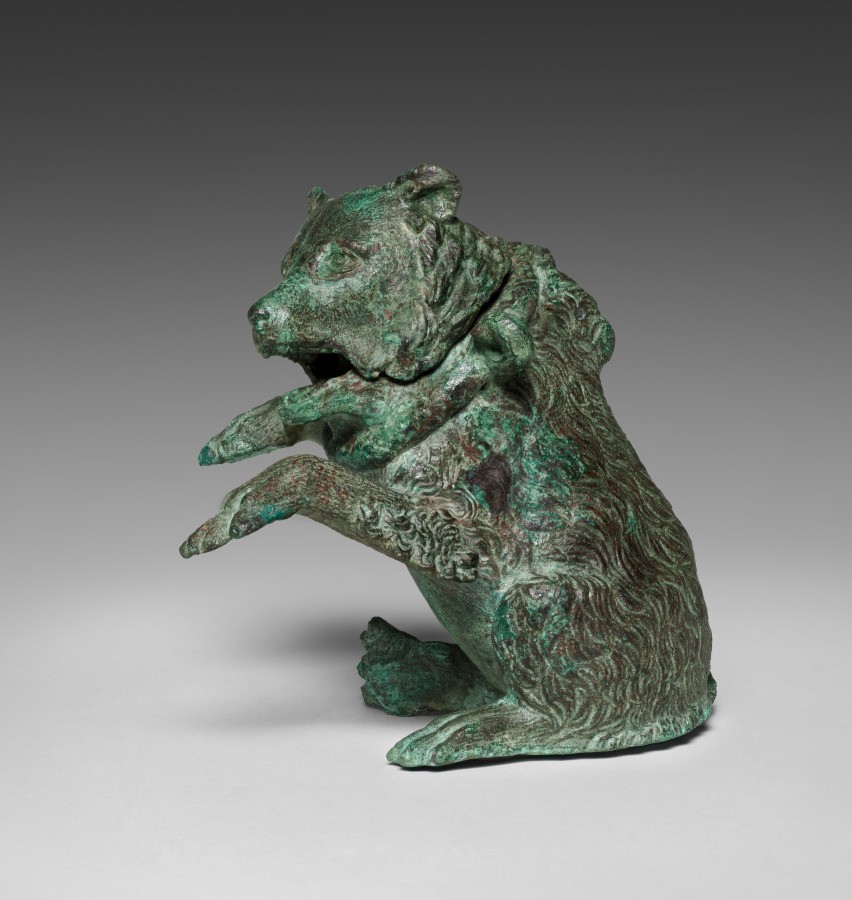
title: Oil Ampulla in the Form of a Dancing Bear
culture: Italy, Roman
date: 200s CE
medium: bronze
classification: Sculpture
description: This bronze bear sits on its hindquarters with its front paws raised, head slightly turned left, and mouth gaping open. It wears a collar around its neck with two rings on either side, where a chain would be passed through to suspend the ampulla. The bear’s head is hinged at the back of the collar to open the vessel, with the lower jaw forming a spout. The eyes were once pierced to prevent an airlock within the ampulla. Bears, like many other animals in antiquity, were used as a form of entertainment, demonstrated here by the bear’s “dancing” pose.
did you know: This ampulla was likely used to carry oil to the baths in antiquity.